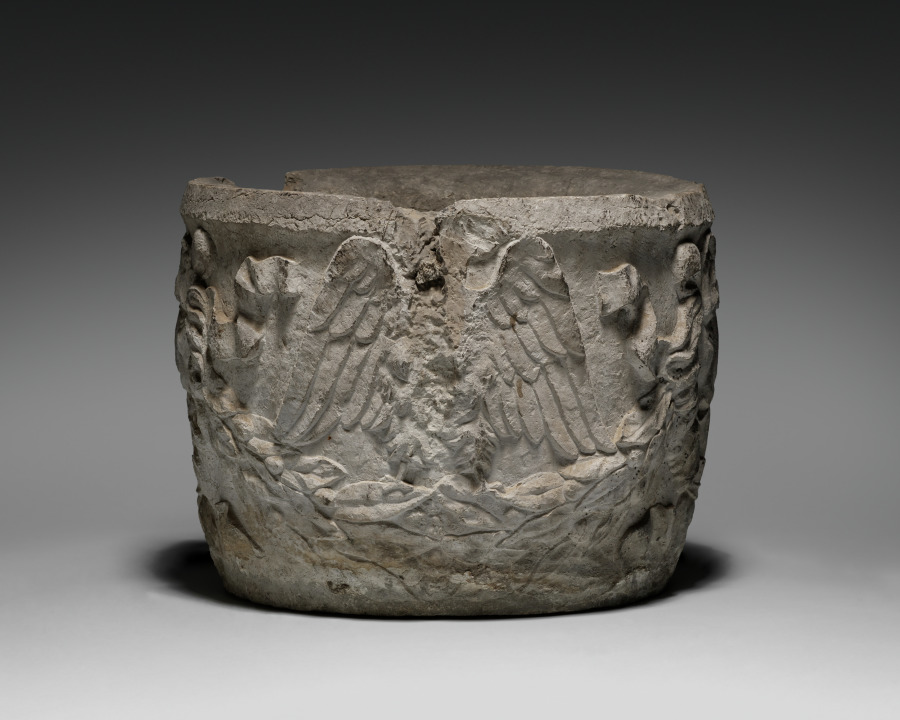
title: Garden Pot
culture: Italy, 19th century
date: 19th Century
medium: stone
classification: Miscellaneous